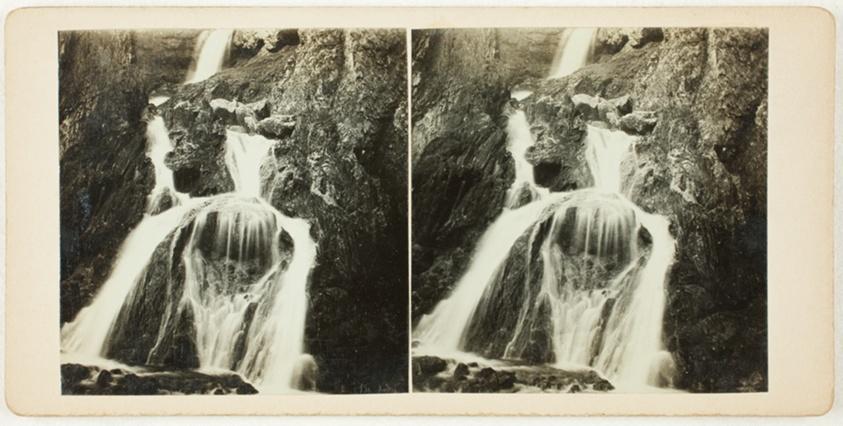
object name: Photograph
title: Untitled (Gordale Scar)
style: 19th century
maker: Artist unknown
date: 1860s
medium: Albumen print, stereo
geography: North Yorkshire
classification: photograph; albumen silver print; photography